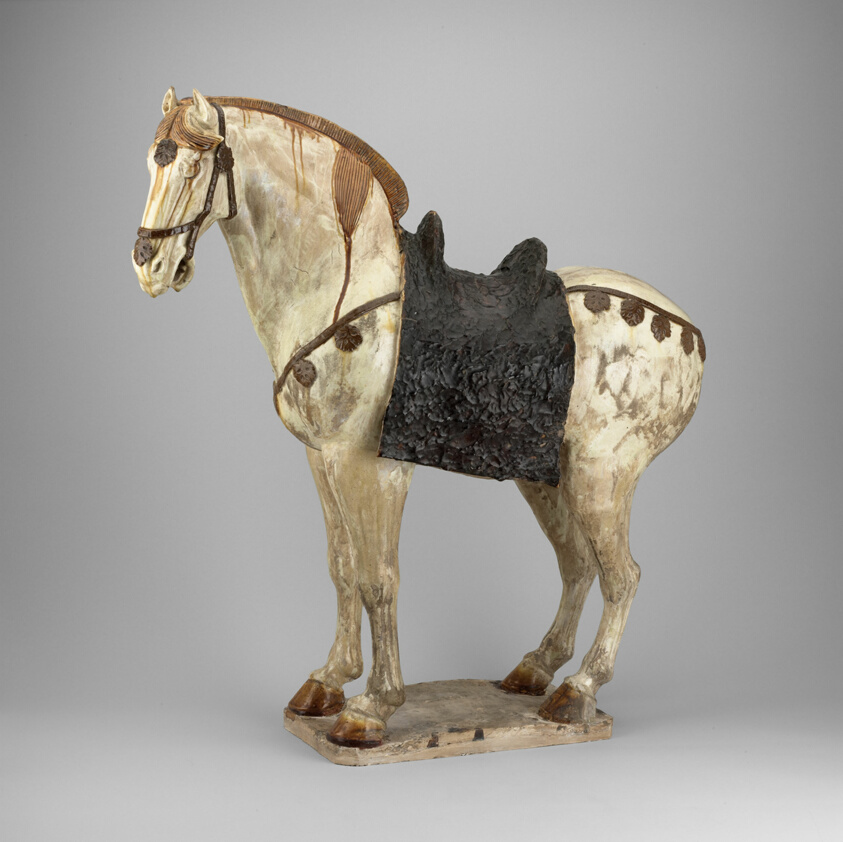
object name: Sculpture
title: Horse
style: Chinese (culture or style)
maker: China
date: Tang dynasty (618–907), first half of 8th century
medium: Earthenware with three-color (sancai) lead glazes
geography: China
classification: earthenware; ceramics; asian art; sculpture